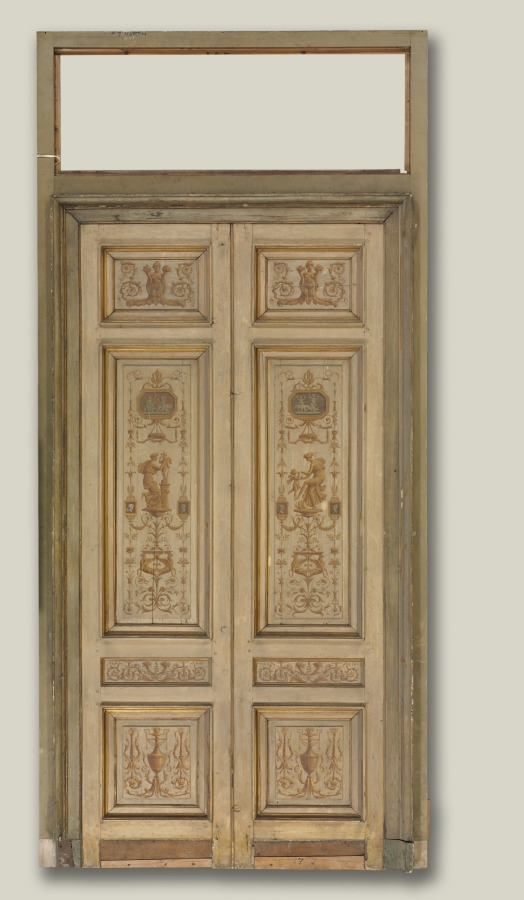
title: Double-Leaf Doors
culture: France, 18th century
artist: Pierre Rousseau (French, 1751–1829)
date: 1790s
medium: oil on wood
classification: Painting